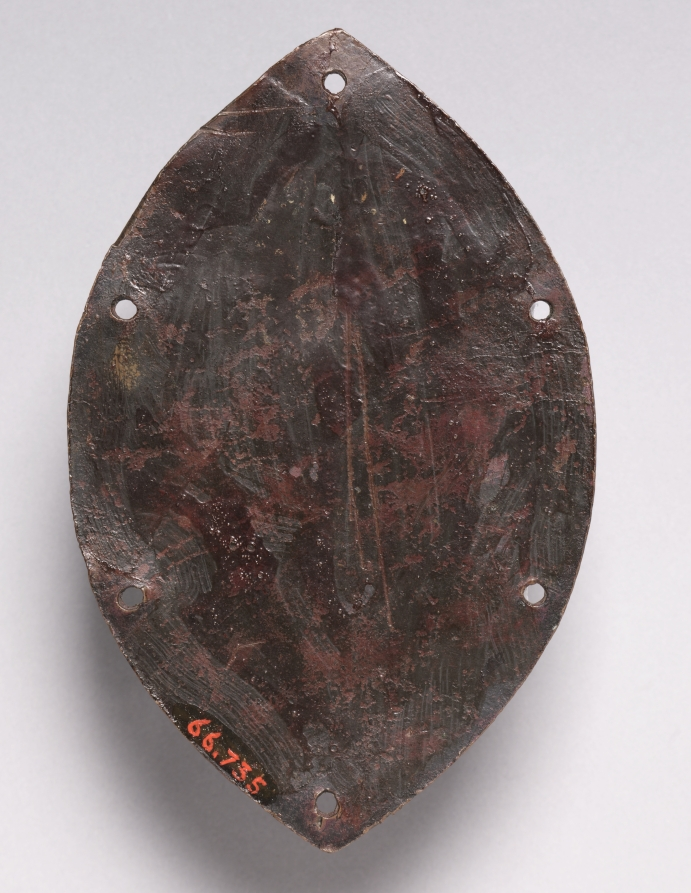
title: Enamel Plaque from the Altar Frontal of Saint Martin at Orense (Spain)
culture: France, Limoges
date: 1174–1213 (probably before 1188)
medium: copper: engraved, stippled, gilded; champlevé enamel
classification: Enamel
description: This almond-shaped enamel plaque depicts the half-length figure of an angel inscribed in a medallion. A nearly identical plaque in the cathedral treasury of St. Martin at Orense in Galicia (Northern Spain) suggests that this plaque once formed part of a large altar frontal commissioned by Bishop Alfonso of Orense (reigned 1174–1213). Fifty-three enameled plaques of this important ensemble are still preserved at the Cathedral of Orense. Others, including this one, were possibly removed during the Napoleonic era.